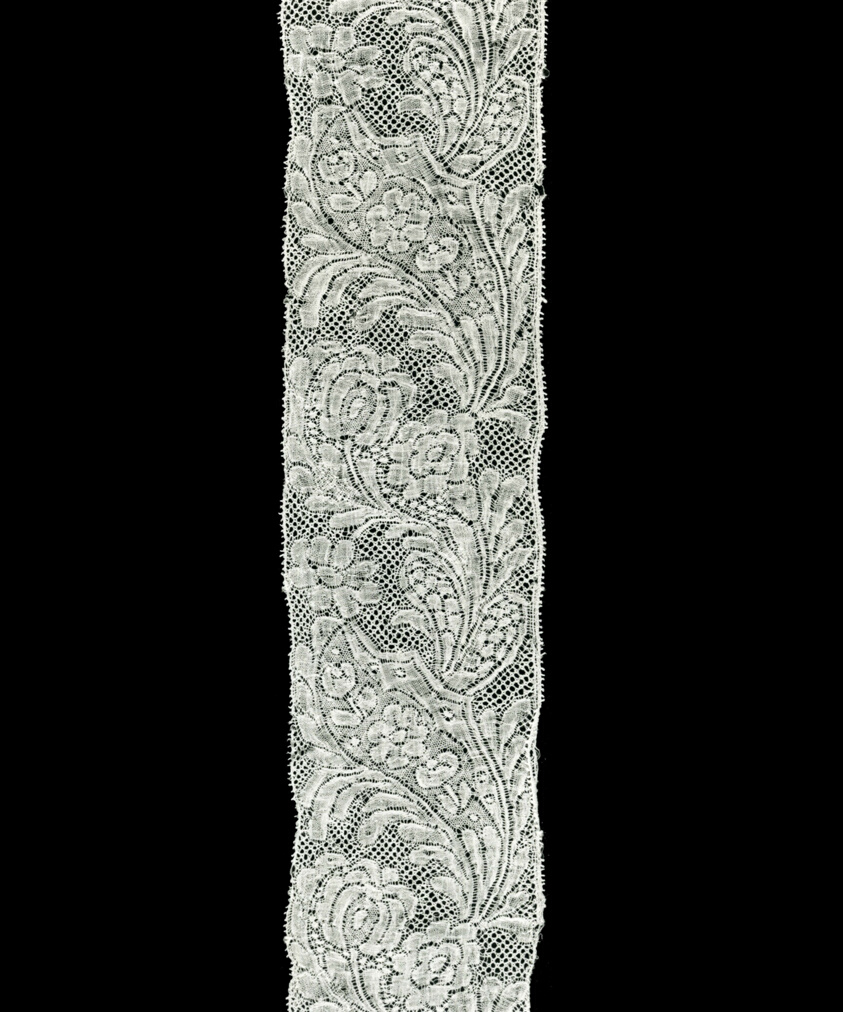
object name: Textile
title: Border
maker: France, Valenciennes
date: 1715/25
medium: Linen, bobbin straight lace of a type known as "Valenciennes" with a five hole mesh ground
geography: Valenciennes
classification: textile; lace - bobbin